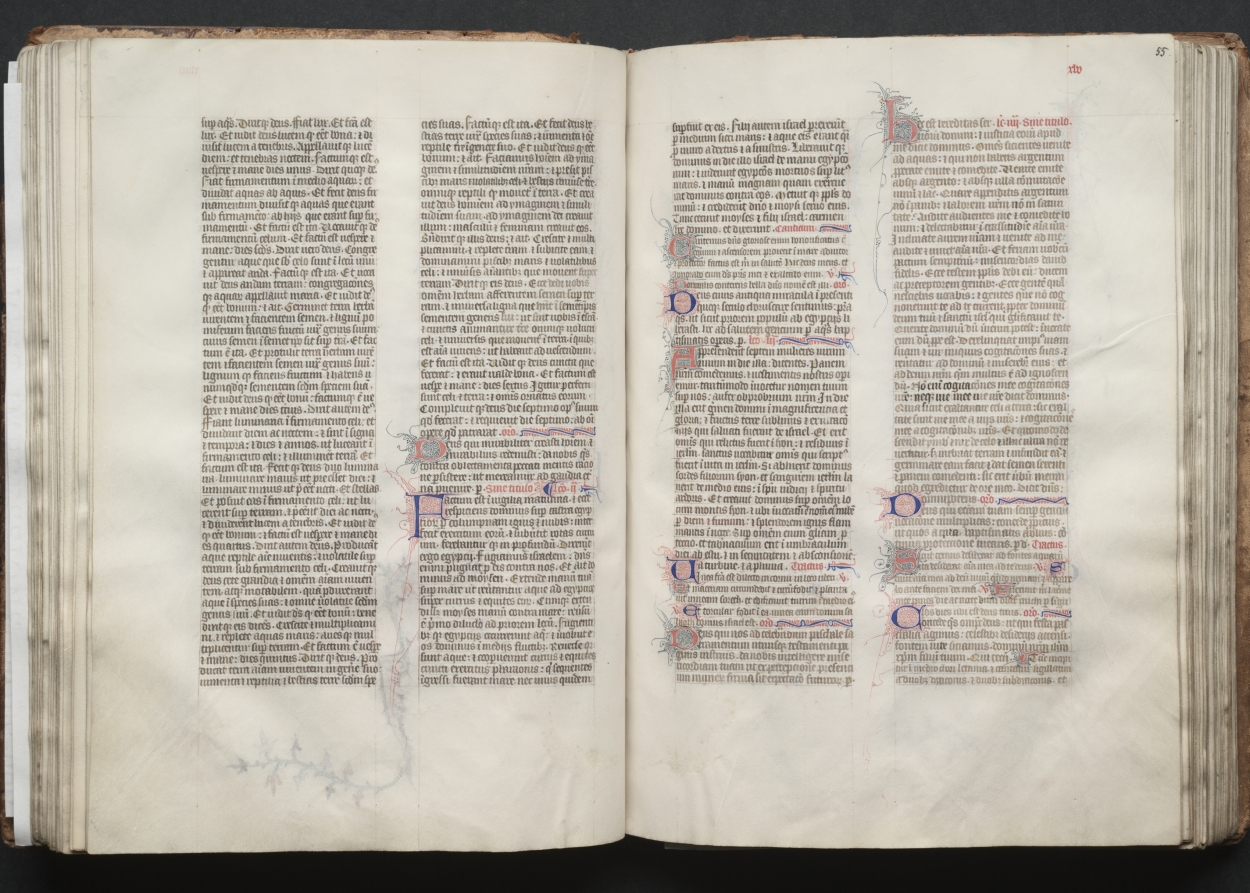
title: The Gotha Missal: Fol. 55r, Text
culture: France, Paris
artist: Master of the Boqueteaux (French)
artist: and Workshop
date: c. 1375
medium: ink, tempera, and gold on vellum; blind-tooled leather binding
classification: Bound Volume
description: The style and quality of this manuscript's decoration is typical of deluxe Parisian books made for aristocratic or royal patrons. Most of the book's decoration appears to be the work of the Master of the Boqueteaux, an artist active at the court of King Charles V (died 1380). His style was apparently shared by a number of book illuminators working in and around Paris. It is very possible that the Gotha Missal belonged to Charles V, but is not provable because the manuscript has no royal portraits and lacks a colophon. Given the book's magnificent decoration, however, it would seem that it was produced for a Valois prince, if not for the king himself. The manuscript receives its name from the German dukes of Gotha, its later owners.